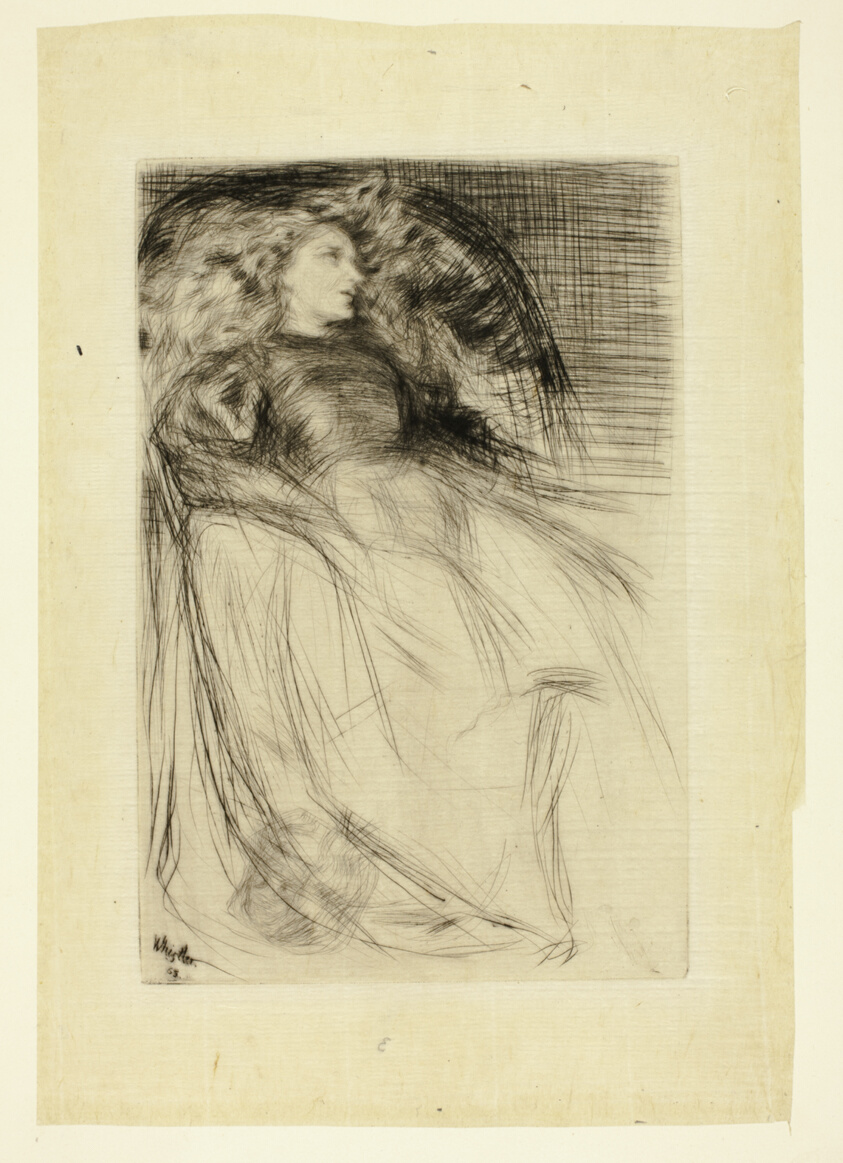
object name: Print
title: Weary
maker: James McNeill Whistler (American, 1834-1903)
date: 1863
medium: Drypoint in black on cream Japanese paper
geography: United States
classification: drypoint; print; prints and drawing; paper